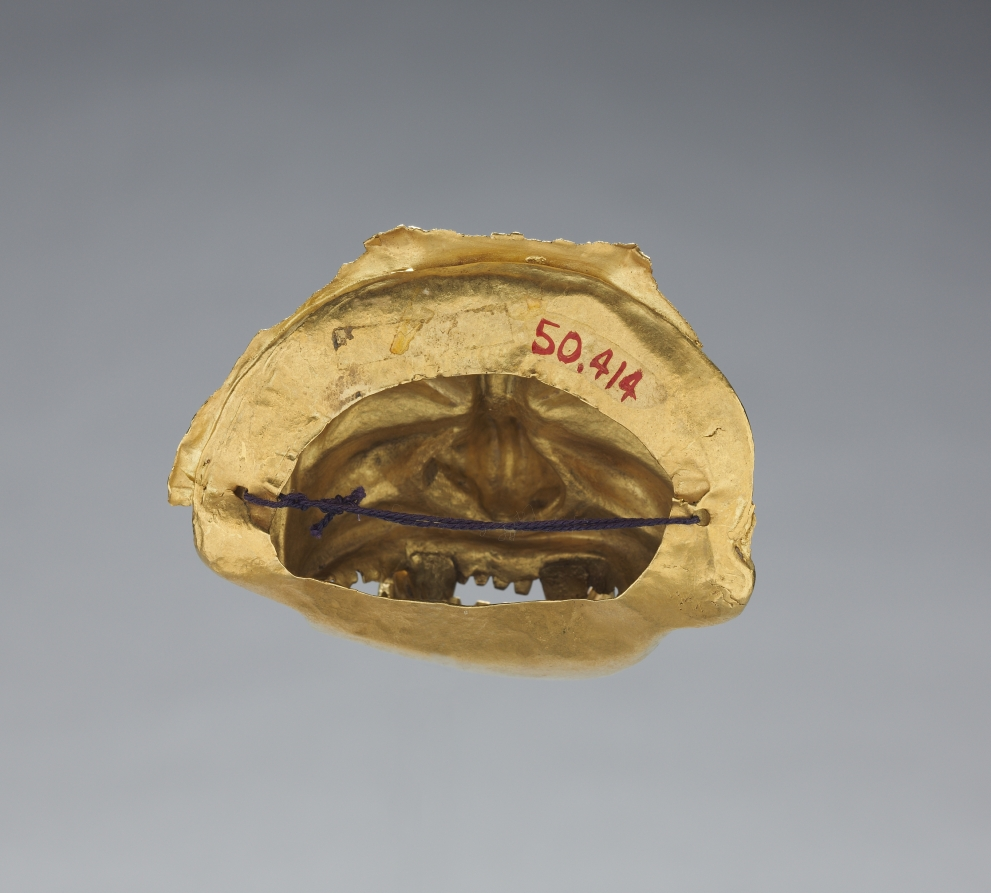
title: Mask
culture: Peru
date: 200–1000 CE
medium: gold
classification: Metalwork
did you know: Fangs were a marker of supernatural power for many ancient Andean societies.